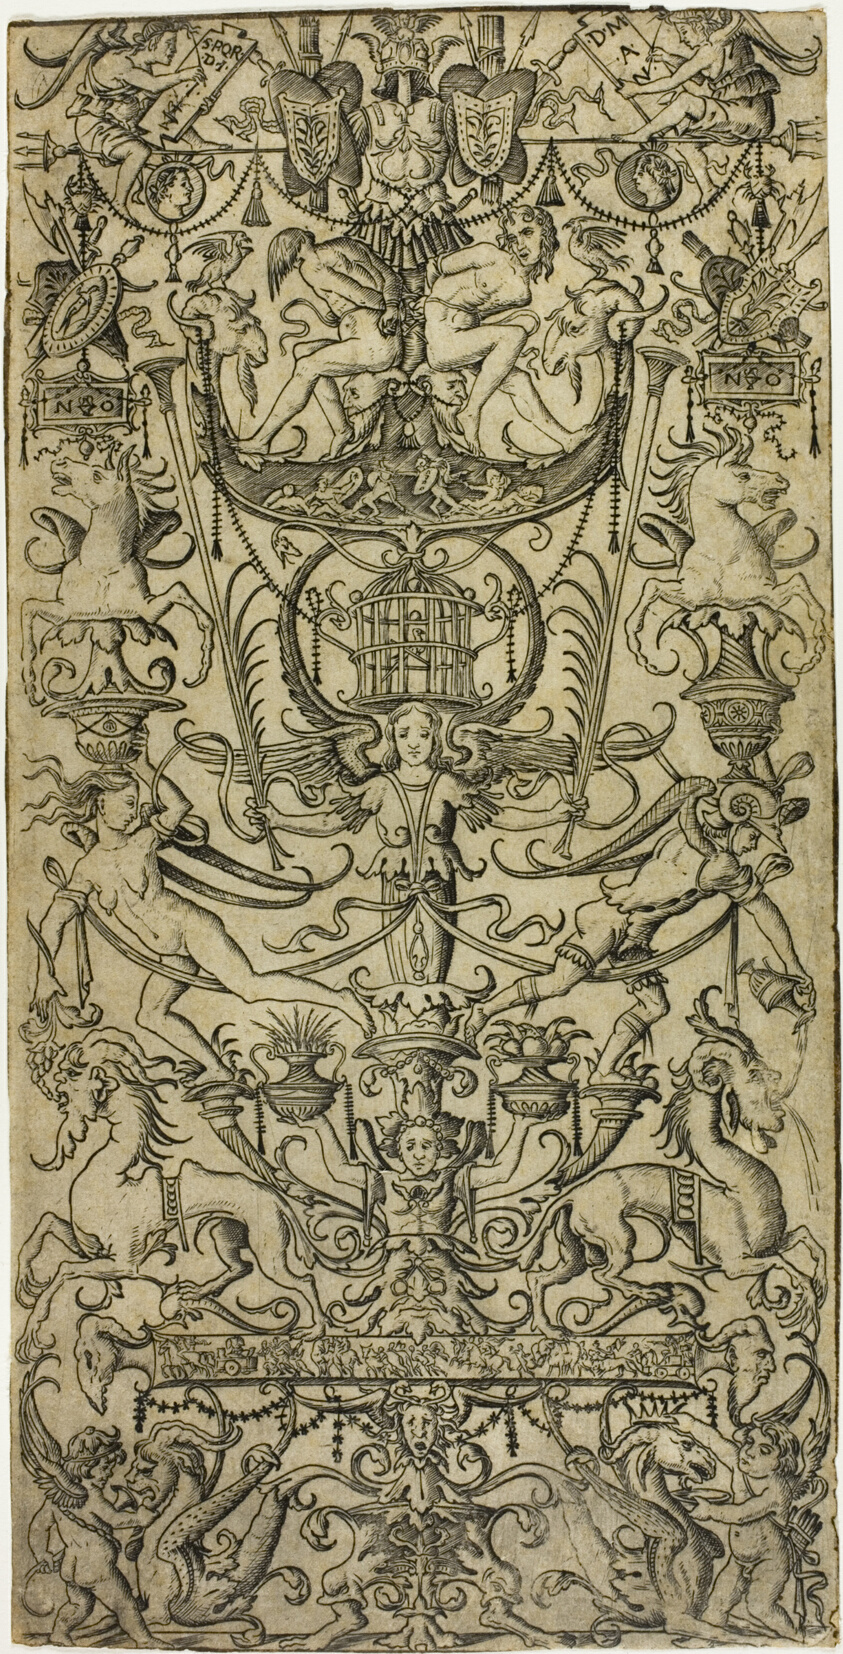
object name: Print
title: Panel of Ornament with a Birdcage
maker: Nicoletto da Modena (Italian, active c. 1500-c. 1520)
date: c. 1507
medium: Engraving on paper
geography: Italy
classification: engraving; print; prints and drawing